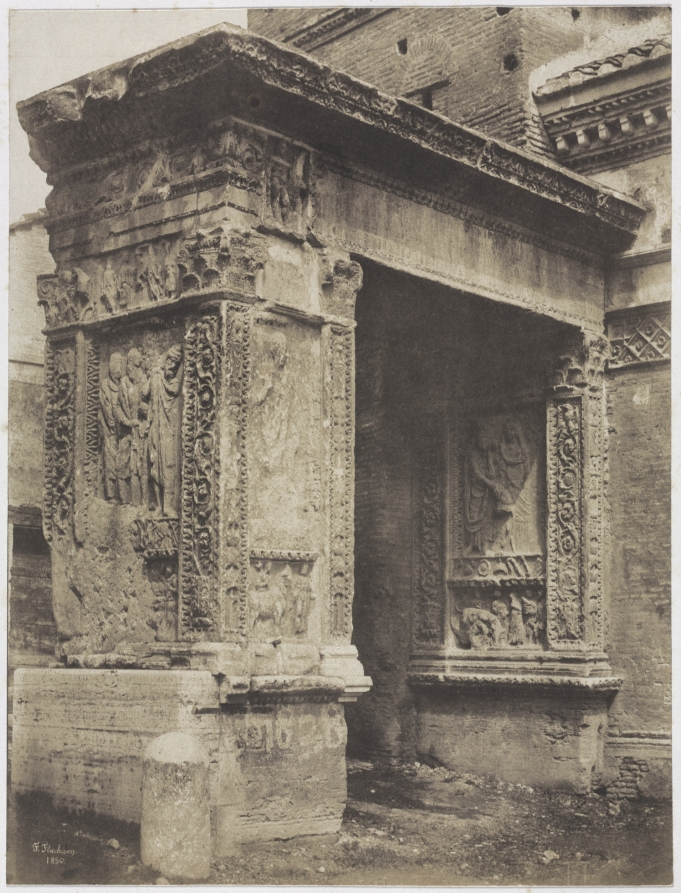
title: Goldsmith's Arch, Rome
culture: France, 19th century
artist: Frédéric Flachéron (French, 1813–1883)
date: 1850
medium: Salted paper print from a paper negative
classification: Photograph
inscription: Written in pencil on verso: "XX ACDP27B"